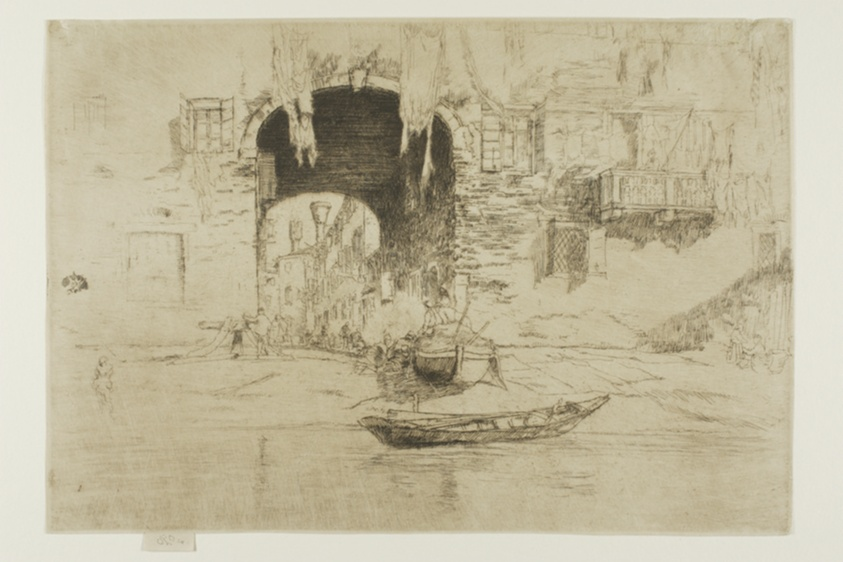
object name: Print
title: San Biagio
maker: James McNeill Whistler (American, 1834-1903)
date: 1880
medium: Etching and drypoint with foul biting in dark brown ink on ivory Asian laid paper altered to buff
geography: United States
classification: etching; foul biting; print; prints and drawing; drypoint; paper